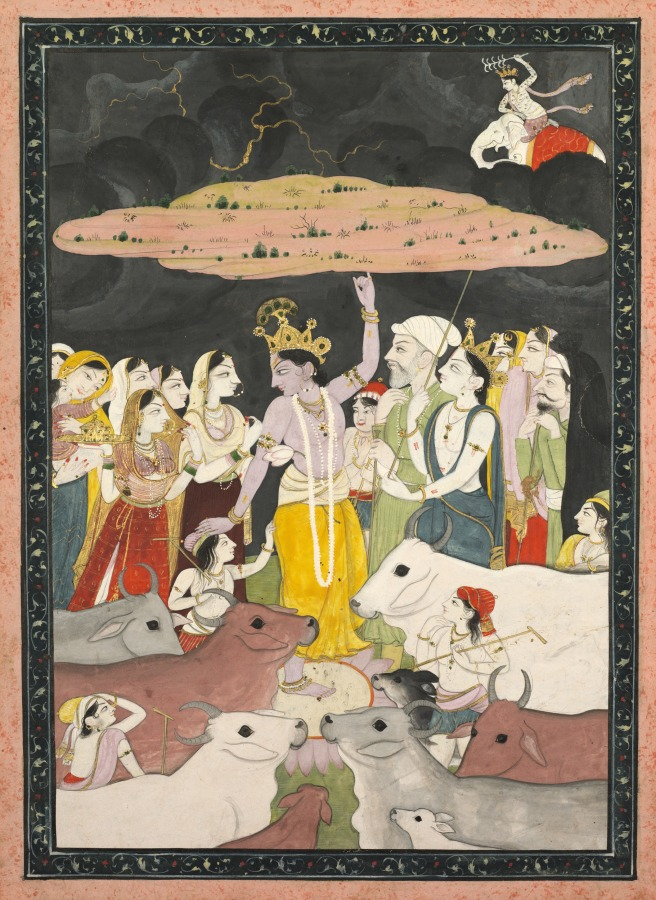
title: Krishna Lifting Mount Govardhan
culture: Northern India, Himachal Pradesh, Pahari Kingdom of Kangra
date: c. 1780–90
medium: gum tempera and gold on paper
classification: Painting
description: Krishna supports Mount Govardhan with nothing but his little finger as he gazes into the eyes of his favorite cowherd girl, Radha, and pats the head of a child. His brother Balarama, with white skin and a blue garment, adds further support with a staff. The cows and members of the herding community all cluster close to Krishna, sheltered from the raging storm sent by Indra riding his white elephant in the sky.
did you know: Eyes cover the body of Indra, known as the "Thousand-Eyed One."